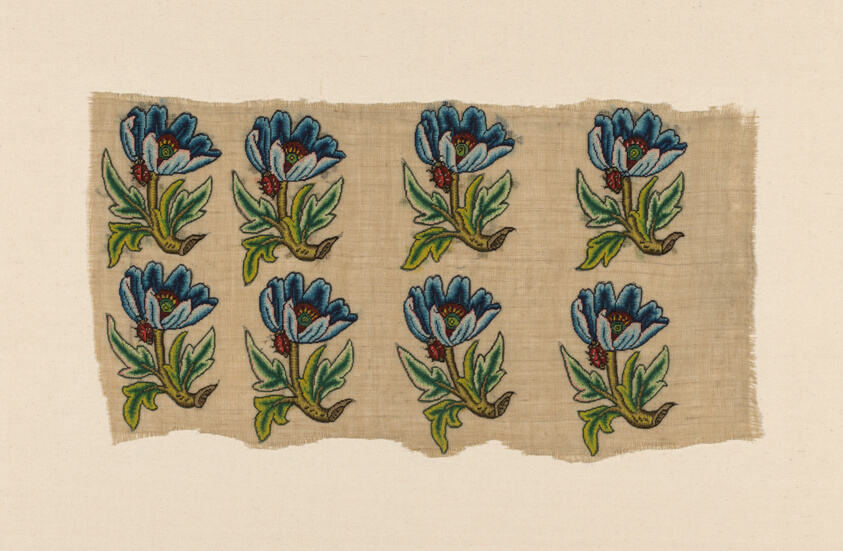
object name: Textile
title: Panel of Uncut "Slip" Designs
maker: England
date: 1625/75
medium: Hemp, plain weave; embroidered with silk in tent stitches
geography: England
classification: textile; needlework (visual works)